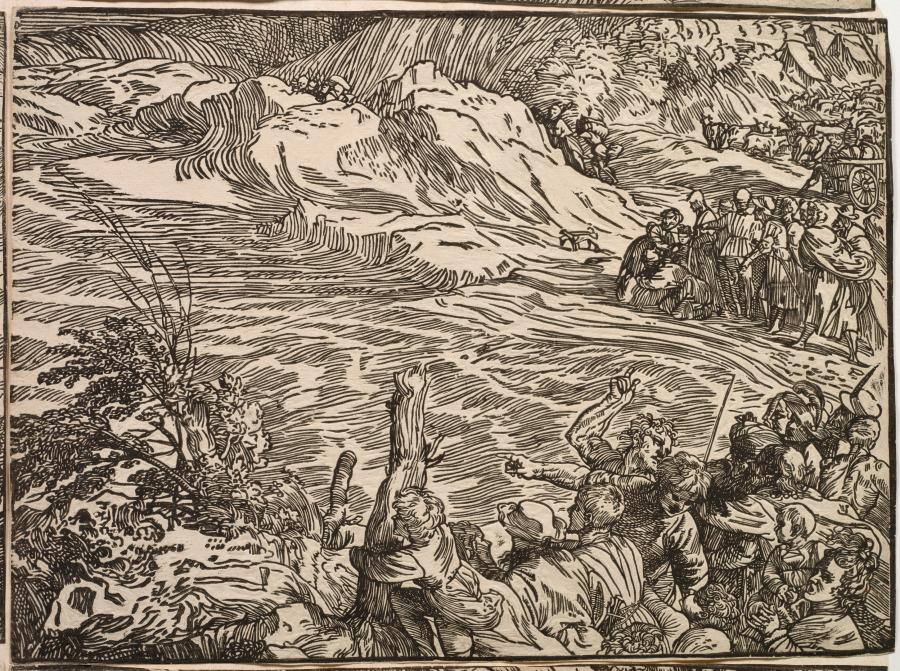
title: The Submersion of Pharaoh's Army in the Red Sea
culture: Italy, Venice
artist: Titian (Italian, c. 1488–1576)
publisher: Domenico dalle Greche (Italian, 1503–1603)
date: 1514–15, printed 1549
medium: woodcut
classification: Print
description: To make this monumental woodcut—considered one of the most ambitious prints of the Renaissance—Titian probably drew directly on the wooden blocks, after which a skilled cutter completed the blocks. The size rivals that of a painting, and the composition would have hung on a wall. Titian’s bold vision presents nature as a vehicle of God’s mercy and wrath. Moses, at right, having parted the seas for the Israelites to pass, commands them to close over the Egyptian forces (Exodus 14:21–31). Titian propelled the narrative with remarkable unity, dedicating entire blocks to the turbulent sea and rolling clouds that culminate in a magnificent cliff and Renaissance city. Some have interpreted the scene as an allegory of Venice’s troubles with the League of Cambrai, a military alliance that threatened the island city.